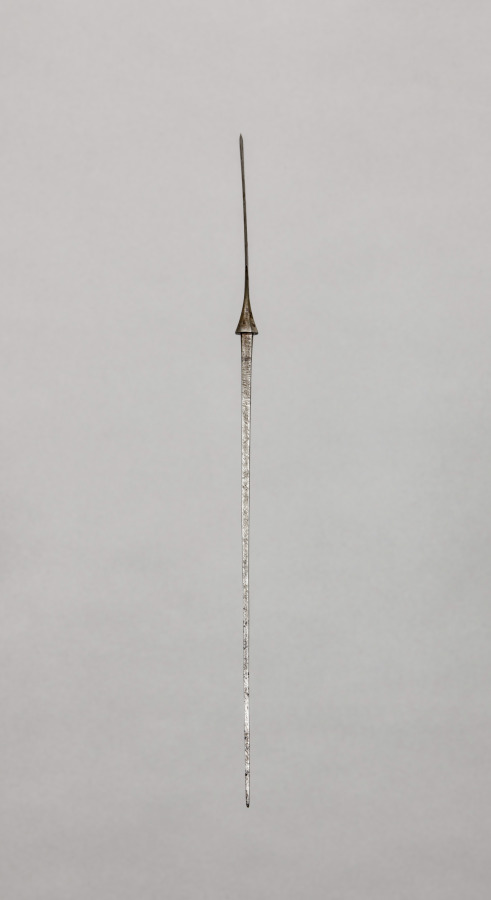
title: Arrow Point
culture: Japan, Edo period (1615–1868)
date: 1700s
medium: steel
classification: Arms and Armor